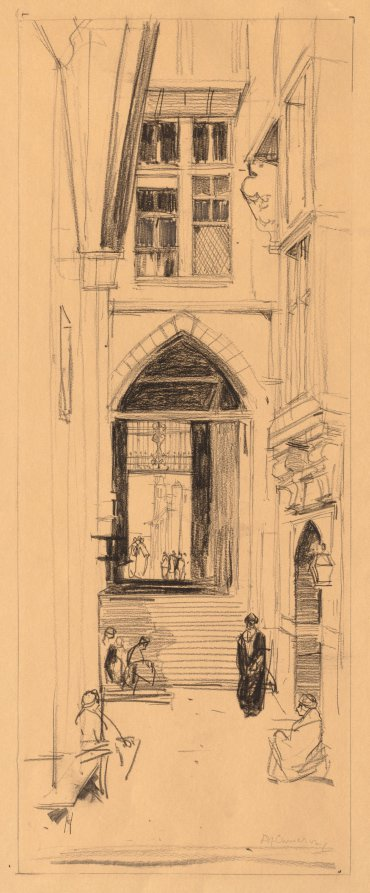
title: A Courtyard in Cairo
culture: England, 19th-20th century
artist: David Young Cameron (British, 1865–1945)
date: c. 1885–1940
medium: charcoal and graphite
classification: Drawing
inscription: Signed in pencil, lower right: "D.Y. Cameron"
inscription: Written in pencil, bottom margin: "A Courtyard in Cairo"